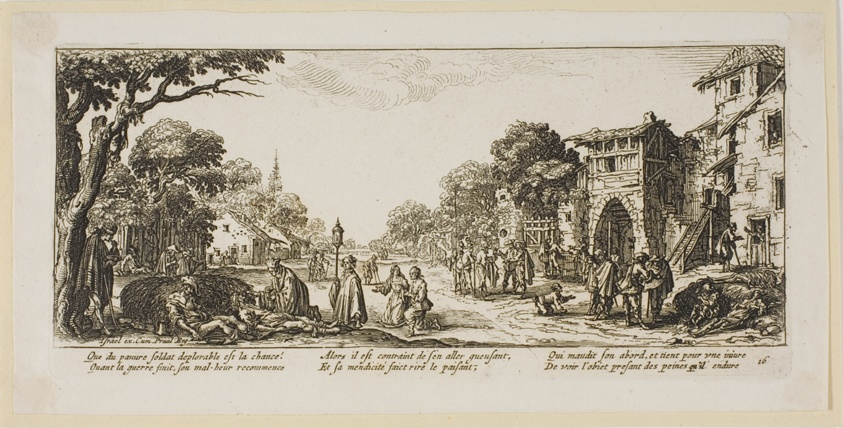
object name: Print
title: Dying Soldiers by the Roadside, plate sixteen from The Large Miseries of War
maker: Gerrit Lucasz van Schagen (Dutch, born 1642); after Jacques Callot (French, 1592-1635)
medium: Etching on paper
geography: Netherlands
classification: etching; print; prints and drawing